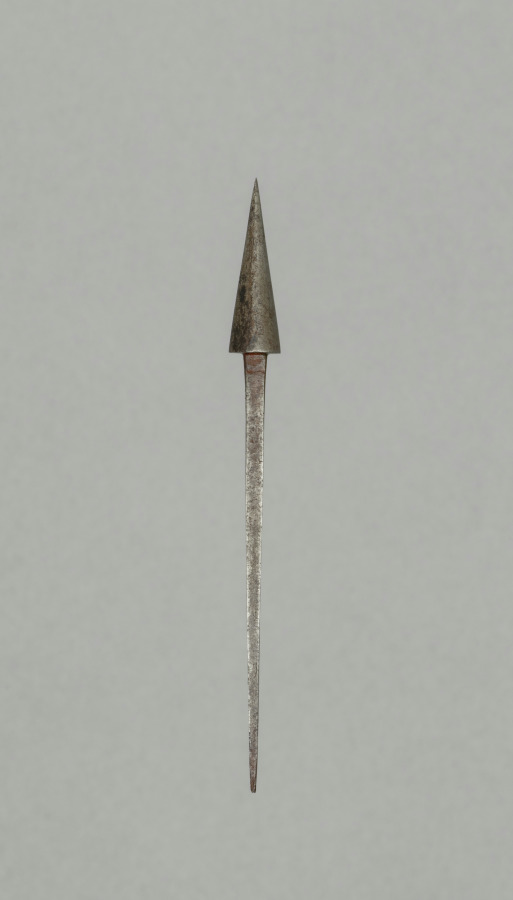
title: Arrow Point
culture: Japan, Edo period (1615–1868)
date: 1700s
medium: steel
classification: Arms and Armor